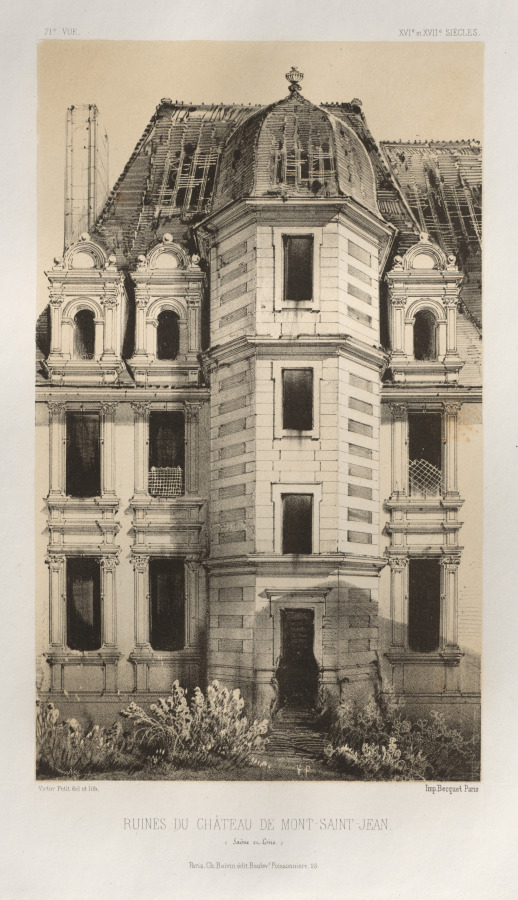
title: Architecture Pittoresque ou Monuments des XVeme. Et XVIeme. Siecles: Chateaux de France des XV et XVI Siecles: Pl. 71, Ruines Du Château De Mont-Saint-Jean (Saône et Loire)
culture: France, 19th century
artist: Victor Petit (French, 1817–1874)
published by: Charles Boivin (publisher and editor); Lith de Godard a Paris (printer)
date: 1860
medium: lithograph with tint stone, from portfolio of 100 lithographs with tint stone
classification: Print